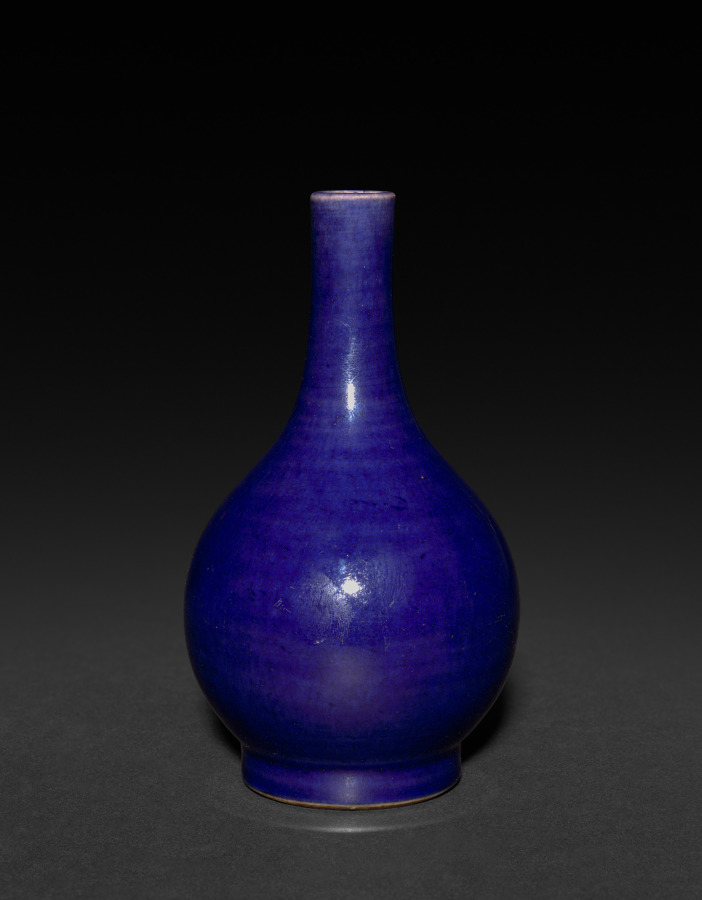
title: Bottle-Shaped Vase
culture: China, Qing dynasty (1644–1911), Qianlong reign (1736–95)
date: 1736–95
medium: porcelain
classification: Ceramic